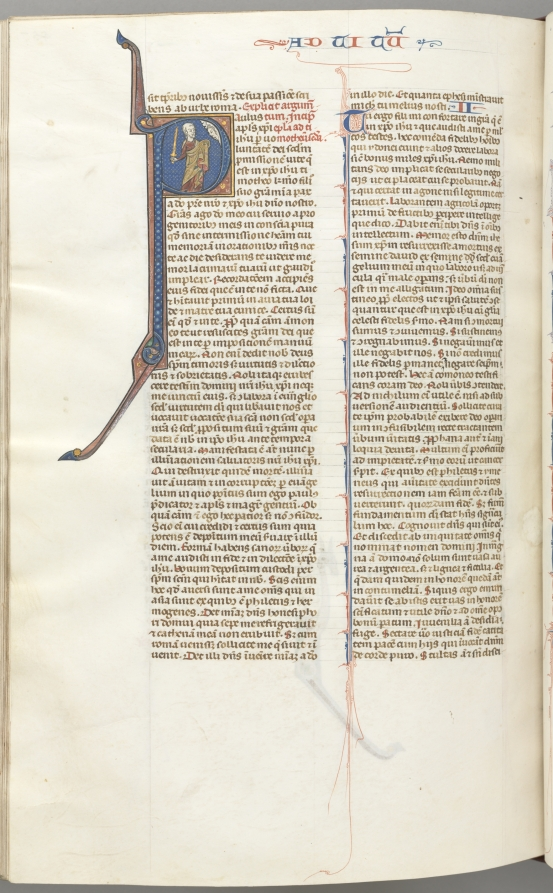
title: Fol. 457v, Timothy II, historiated initial P, Paul talking to the bust of God above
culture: Southern France, Toulouse(?), 13th century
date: c. 1275–1300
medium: ink, tempera and gold on vellum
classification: Bound Volume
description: Biblical manuscripts were highly prized and important possessions of churches, monasteries, cathedral schools, and universities throughout medieval Europe. The biblical texts were known as the vulgate, the translations made by Saint Jerome in the fourth century from Hebrew and Greek into Latin, which became the definitive and official Latin version of the Roman Church. In the 13th century, the bible was, for the first time, produced as a single volume with an officially sanctioned sequence to its books and chapters as illustrated by this example. The very extensive decoration of this bible is arranged hierarchically to indicate the relative importance of the various texts so that full or almost full-page initials mark the openings of the first prologue, Genesis, and the first Gospel; historiated initials mark the beginning of each book and illuminated initials mark the Prologues.